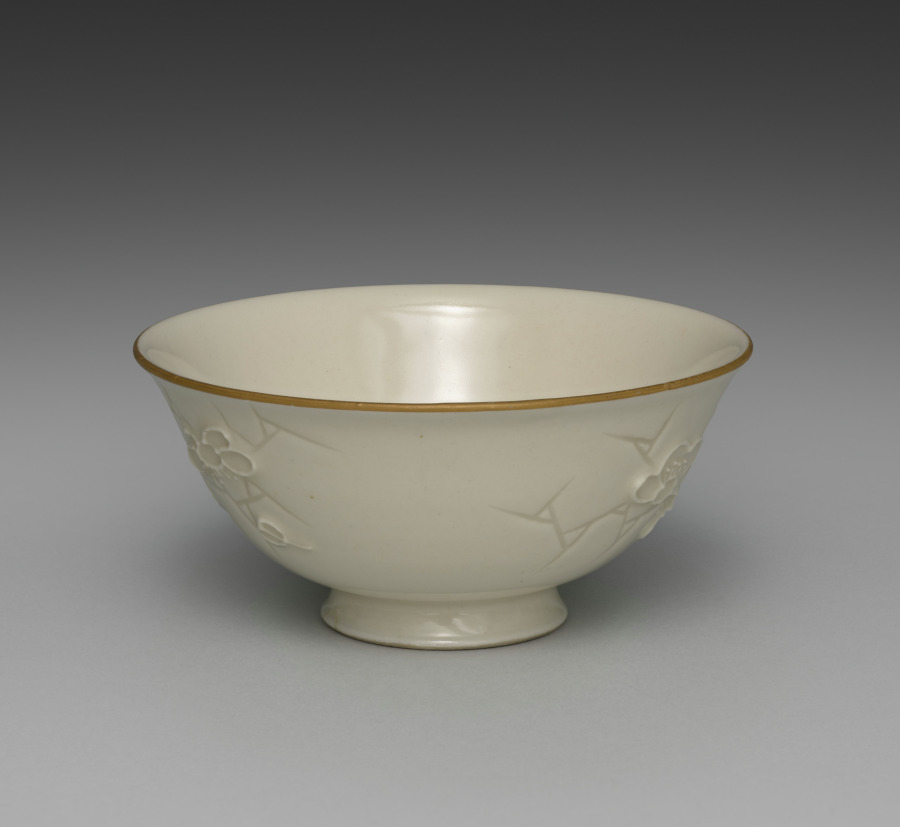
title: Bowl from Dining Set with Plum Blossoms and Cracked-Ice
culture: Japan, Meiji period (1868–1912)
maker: Seifū Yohei II (Japanese, 1844–1878)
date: c. 1875–78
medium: Porcelain with molded designs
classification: Ceramic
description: Each item in this set has a delicate low-relief design of flowering plum branches over scattered, intersecting lines meant to resemble the cracked-ice surface of a frozen body of water and is signed on the base in gold pigment. While Yohei II produced many fine works in underglaze blue, like those produced by Kiyomizu Shichibei, he also made works in quite different styles later in his career, from the early 1870 s. In 1873, he was appointed purveyor to the Industrial Center of Kyoto Prefecture, a designation associated with Kyoto’s efforts to reach an international market through the port of Kobe; and from 1875 until his death, he was involved in national-level projects to present Japanese ceramics across the world. It was during this period that Yohei III was apprenticed to Yohei II, and it has been suggested that this set may in fact be an early example of Yohei III’s work, which he signed with his teacher’s name. Decorated with flowers resembling Japanese textile motifs, the set calls to mind the design of Yohei II’s pair of vases with plum blossoms in the Victoria and Albert Museum. Here, the elaborate trees created for a formal public exhibition setting have been translated into the approachable blossoms of the genteel domestic environment. While the designs are consistent across the pieces, each raised flower petal and pistil and each incised line in the ice was done by hand, so the cups, bowls, and dishes are similar yet unique. The bottoms of two boxes once identified the set’s owner, but the information has been deliberately obscured with black ink. However, inscriptions still visible appear to indicate two occasions, once at the end of July 1886 , and once again in June 1916 , when parts of the set were requested from Hokura in Niigata Prefecture. The location corresponds to a neighborhood in the present-day city of Jōetsu. The surname Tsuji 辻 also appears on a paper tag affixed to one of the box cloths. Future research may possibly reveal more about their provenance. A vase by Yohei III in a private collection combines the formal grandeur of the Yohei II vases in the Victoria and Albert Museum with the gentler design of this dining set, placing flowering plum trees against soft, scalloped-edge clouds resembling those in golden screens.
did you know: The dining wares have a creamy white coloration that the four boxes containing them identify as Korean in style.